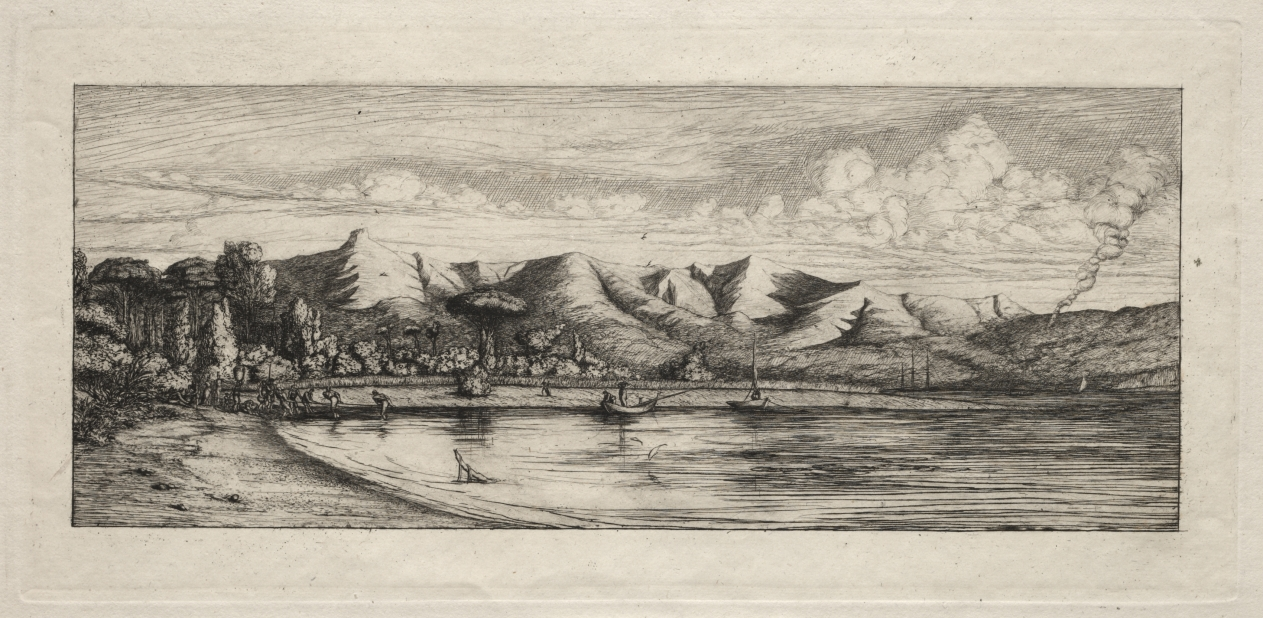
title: Seine Fishing off Charcoal Burner's Point, Akaroa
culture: France, 19th century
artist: Charles Meryon (French, 1821–1868)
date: 1865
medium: etching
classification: Print